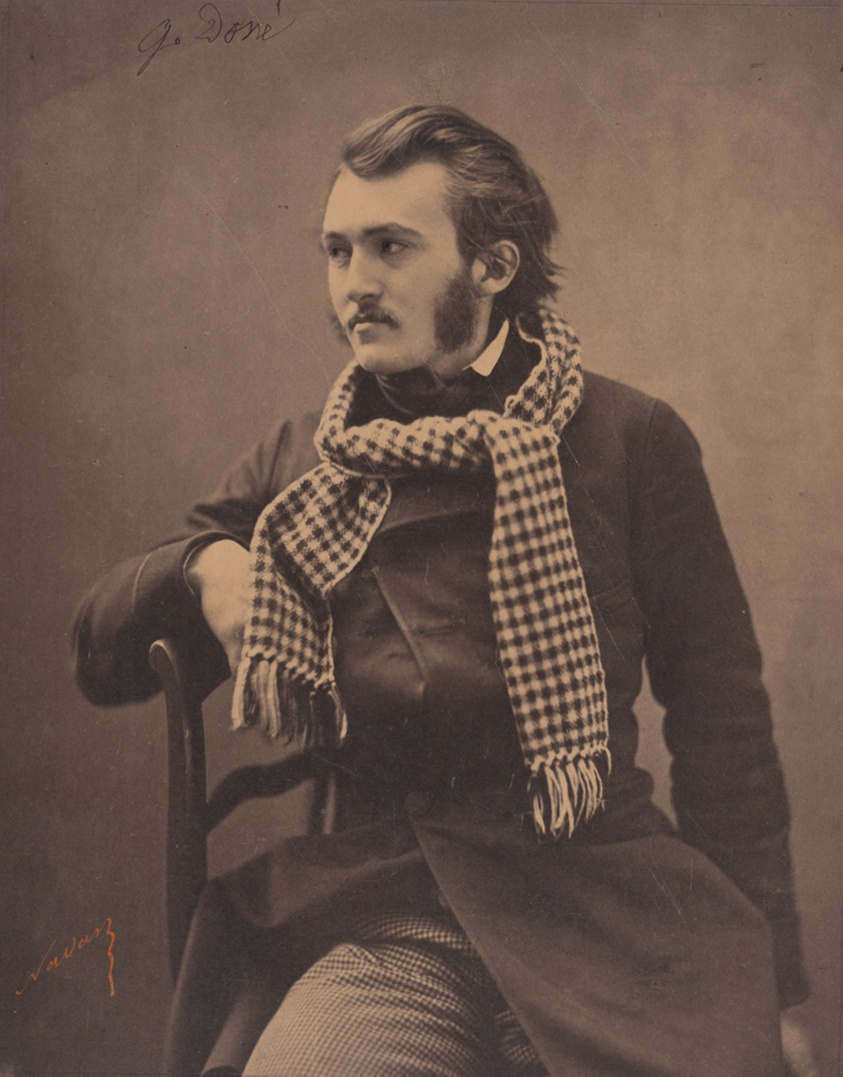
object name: Photograph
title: Gustave Doré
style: 19th century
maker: Nadar (Gaspard Félix Tournachon) (French, 1820–1910)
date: 1856-58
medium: Albumen print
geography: France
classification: albumen silver print; photographic process; photography; photograph